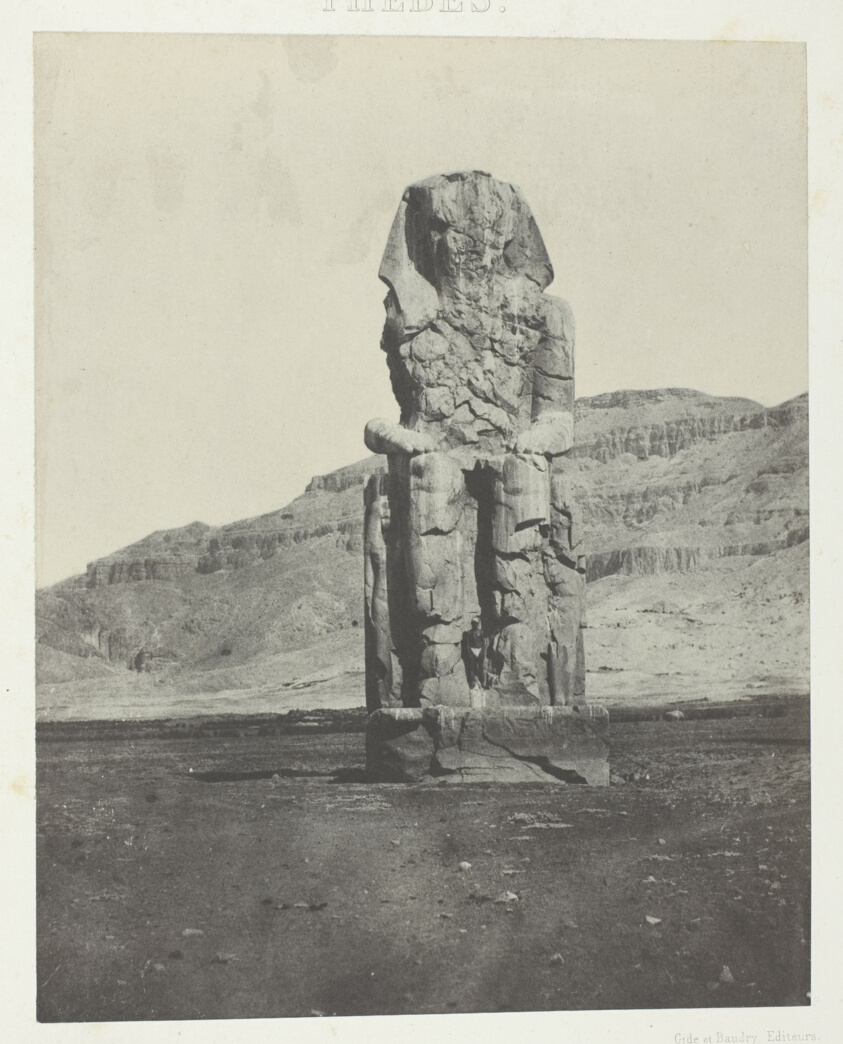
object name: Photograph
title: Gournah, Colosse Monolithe d'Aménôpht III; Thèbes, plate 56 from the album "Egypte, Nubie, Palestine et Syrie" (1852)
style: 19th century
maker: Maxime Du Camp (French, 1822–1894)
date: 1849/51, printed 1852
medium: Salted paper print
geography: France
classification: salted paper print; photographic process; photography; photograph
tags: Collected by Hugh Edwards, Egypte, Nubie, Palestine et Syrie